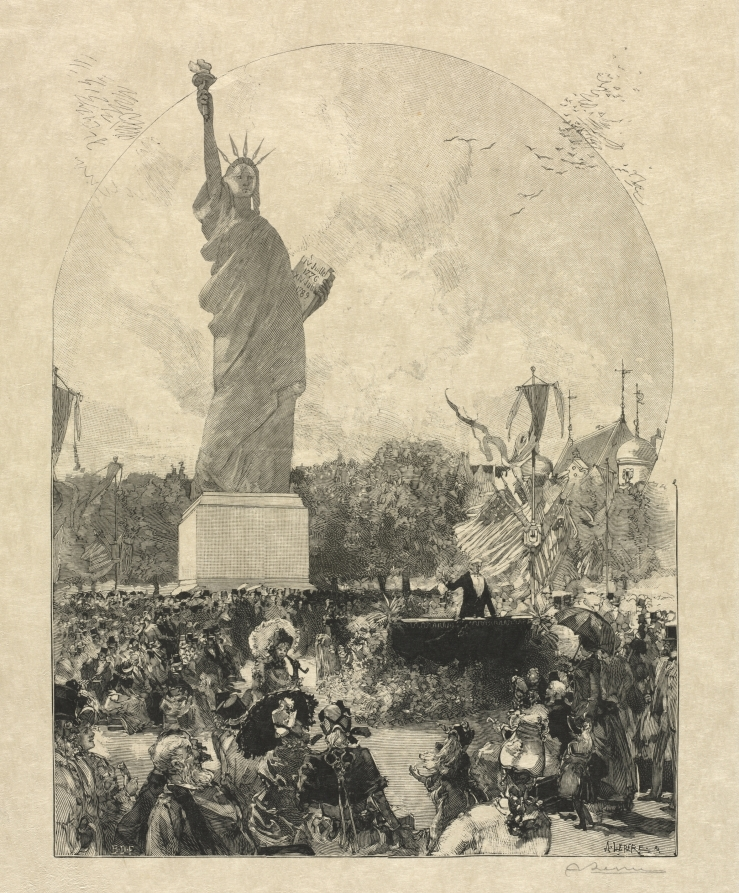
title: Liberty Enlightening the World, Offered to the City of Paris by the Americans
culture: France, 19th century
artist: after Auguste Louis Lepère (French, 1849–1918)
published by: Le Monde Illustré (French, 1857–1940, 1945–1956)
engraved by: Tony Beltrand (French, 1847–1904)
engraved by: and Eugène Dété (French, 1848–1922)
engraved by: Frédéric Florian (Swiss, 1858–1926)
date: 1885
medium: wood engraving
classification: Print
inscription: lower right margin, in pencil: "A Lepere"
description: Although this statue may be recognizable, the scene is not set in New York. Hundreds of smaller versions of the Statue of Liberty reside around the world, including the one depicted in this print, which is located in Paris. Both the United States and France see the statue as a symbol of freedom, and Americans gave one as a gift to Parisians during the 19th century.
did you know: This print was published in the popular journal Le Monde Illustré on May 30, 1885.